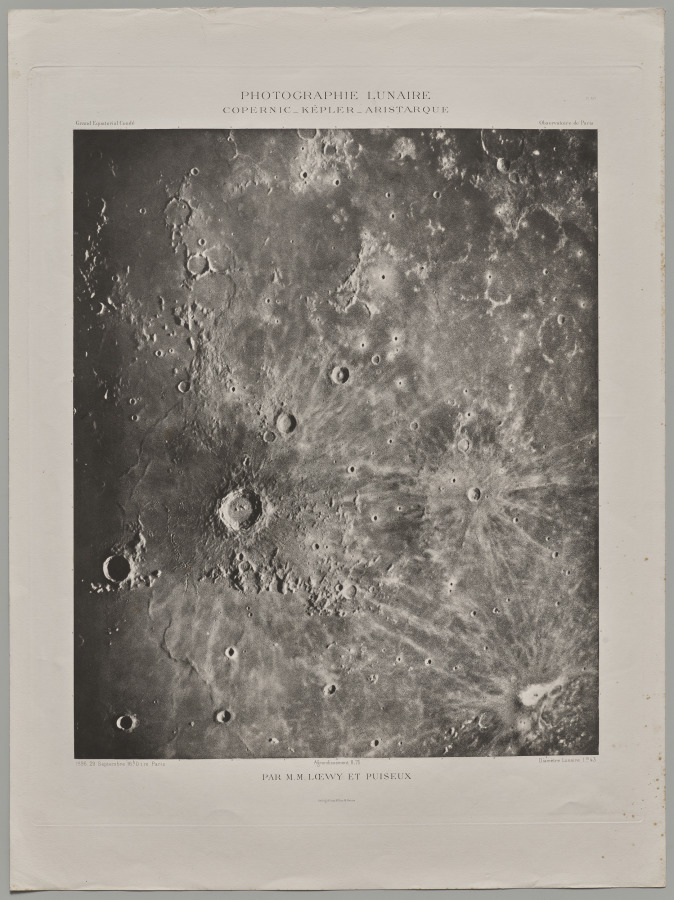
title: Photographie Lunaire: Copernic-Képler-Aristarique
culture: France, 19th century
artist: Maurice Loewy (French, 1833–1907)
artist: Pierre Henri Puiseaux (French, 1855–1928)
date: 1896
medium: photogravure (heliogravure)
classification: Photograph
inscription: Imprinted in black type on recto of photo paper: "Grand Equatorial Coude" Imprinted in black type on recto of photo paper: "1896. 29 Septembre 16 h O.tin.Paris Agrandissement 8.75 Diametre Lunaire 1 m 43" Imprinted in black type along each edge: "1-9" Imprinted in black type on gallery label on verso: "Fraenkel Gallery/49 GEARY STREET SAN FRANCISCO 94108/FURTHERMORE/[30TH Anniversary Exhibition]/Fraenkel Gallery/April 22-June 26, 2010" Imprinted in black type on gallery label on verso: "Fraenkel Gallery/49 GEARY STREET SAN FRANCISCO 94108/LOEWY & PUISEUX/Photographie Lunaire: Copernie-Kepler-/Aristarique, Septembre 29, 1896 heliogravure/22-1/2 x 18-3/4 inches (image)/29-1/2 x 22 inches (sheet)/Plate XVI/[LP.0302.Z]"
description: This plate is from a deluxe 12-volume atlas of the moon created by astronomers Maurice Loewy and Pierre Henri Puiseaux. The atlas remained the most accurate reference of the moon’s surface until the age of space travel. The duo captured thousands of images at the Paris Observatory through a telescope that Loewy invented. It was equipped with a mechanism that tracked the moon’s movements during the exposures. Given weather conditions, they were only able to photograph 50 to 60 nights per year; the project thus took 15 years to complete and contained nearly 100 large-scale photogravures.